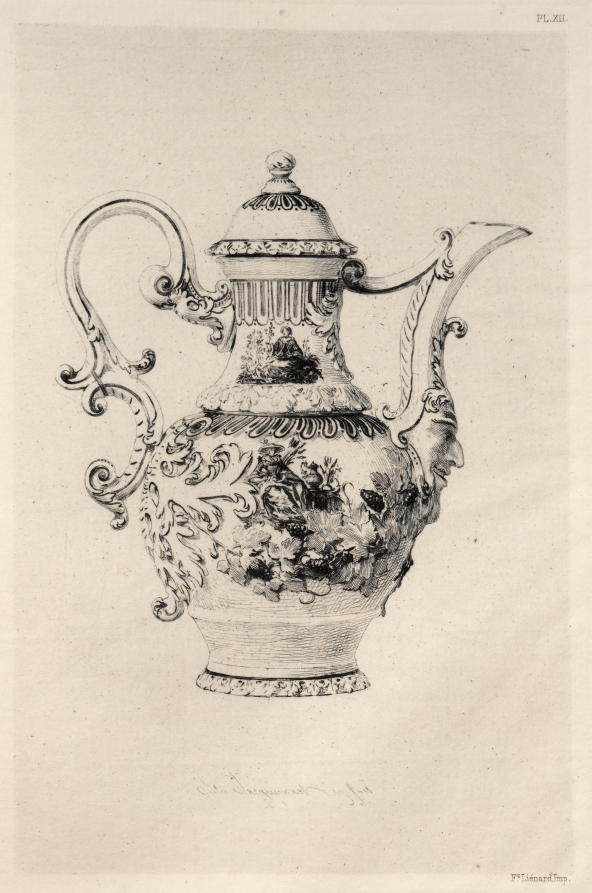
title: History of the Ceramic Art: A Descriptive and Philosophical Study of the Pottery of All Ages and All Nations: Saxony: Dresden- Hard Porcelain- Ewer in Relief, with Figures in Violet Cámaïeu (Plate XII)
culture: France, 19th century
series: Book by Albert Jacquemart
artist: Jules Jacquemart (French, 1837–1880)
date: 1877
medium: etching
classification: Bound Volume